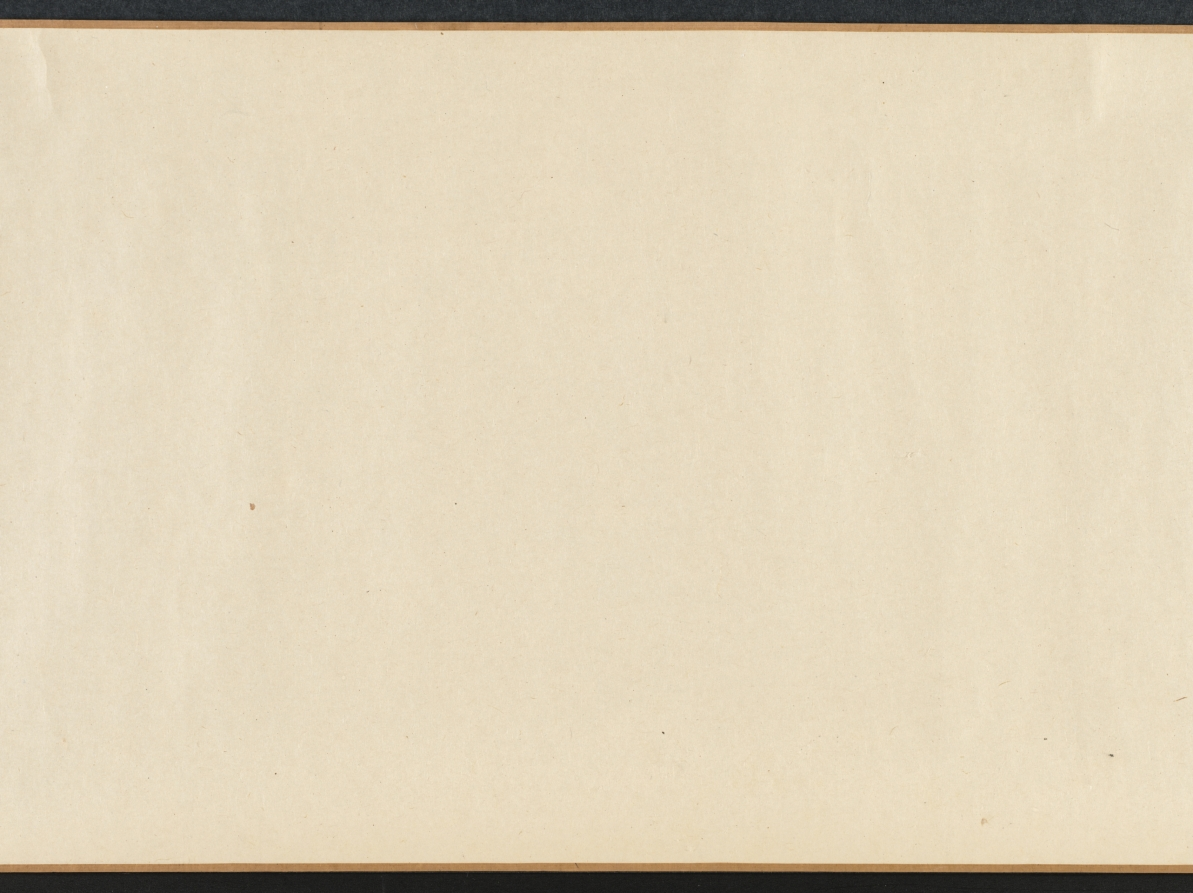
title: Landscape with Bamboo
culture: China, Yuan dynasty (1271-1368)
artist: Song Ke (Chinese, 1327–1387)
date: 1300s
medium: Handscroll; ink on paper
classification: Painting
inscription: 東吳宋克戲為仲幾畏友圖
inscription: 2 colophons and 14 additional seals: 1 seal of Yü Chung-chi (14th c.); 1 seal of Wu Ch'eng (1469 jinshi); 1 colophon and 2 seals of Wu K'uan (1435–1504); 1 colophon and 9 seals of Cheng Qi (1911–1988); 1 seal unidentified.